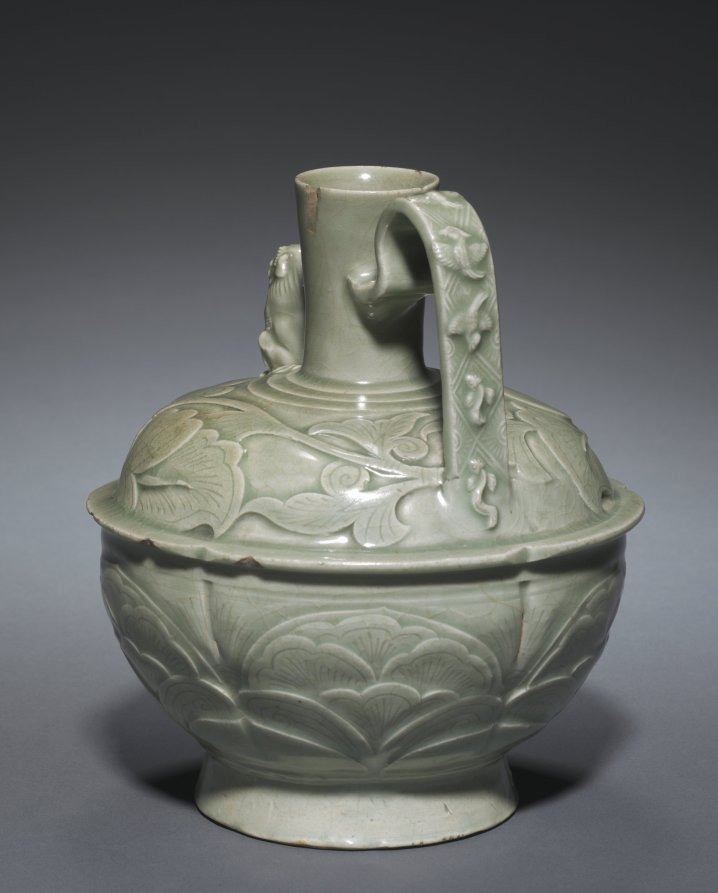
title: Ewer with a Lion-shaped Spout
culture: China, Shaanxi province, Tongchuan, Huangbaozhen, Five Dynasties period (907-960) or Northern Song dynasty (960-1126)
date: 900s–1000s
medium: green-glazed porcelaneous stoneware with modeled, carved and incised decoration, Yaozhou ware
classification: Ceramic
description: This remarkable ewer is most likely a very early and rare type of Yaozhou ware, with the shape and decoration recalling Tang metal ware. High quality pieces like this might have been sent as tribute to the Northern Song court. Yaozhou ware, or northern celadon, appeared to have been made in the north in emulation of the southern Yue ware. But its green glaze has a deep olive-green tone, and potters fully exploited the contrasting tones of the glaze over the incised and carved decoration to create rich textural effects.